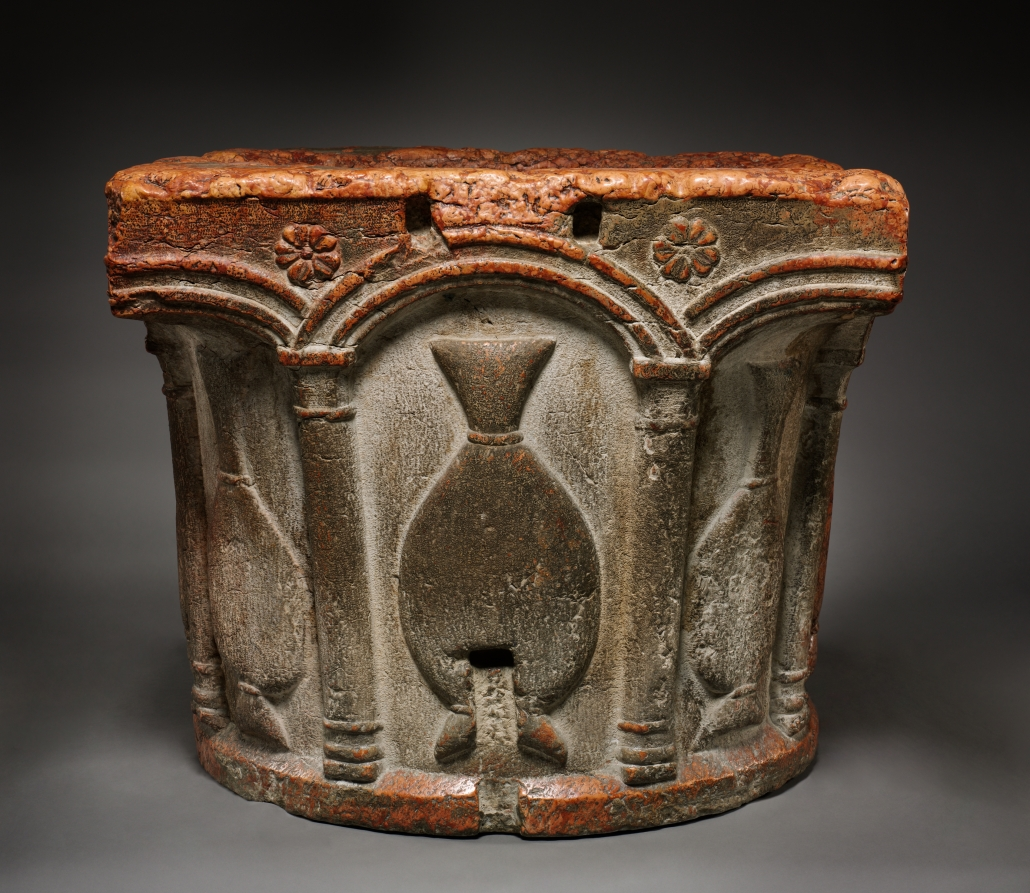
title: Well Head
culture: Italy, probably Verona, 15th century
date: 1400s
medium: pink limestone (called "Verona Marble")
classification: Sculpture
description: A well head is an architectural element that protects the mouth of a well. This example is both decorative and functional. The durable pink limestone well head facilitated access to the water whose restorative nature is echoed in the flowers and vases that ornament its surface.